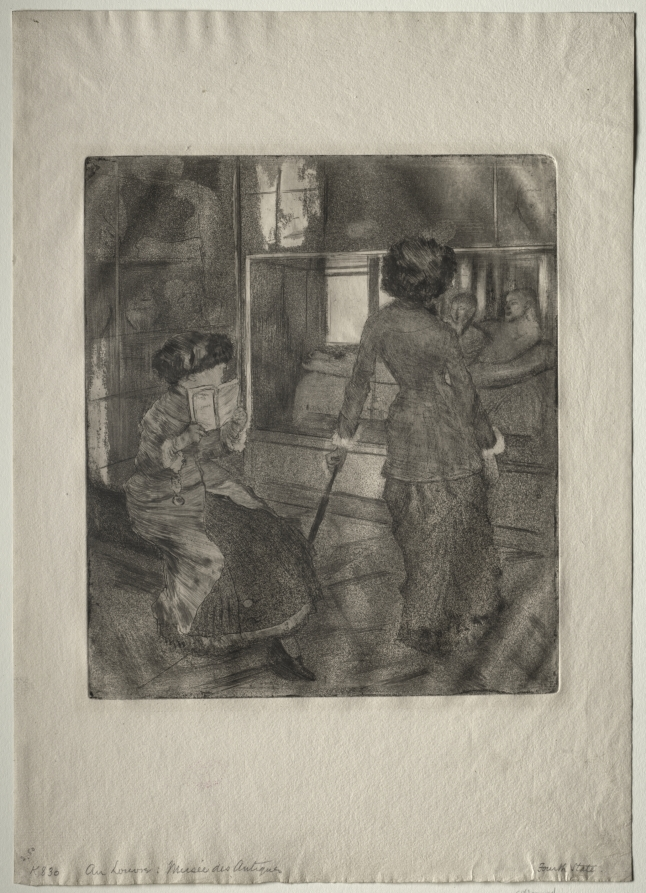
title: Mary Cassatt at the Louvre: The Etruscan Gallery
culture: France, 19th century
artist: Edgar Degas (French, 1834–1917)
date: 1879–80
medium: softground etching, drypoint, aquatint, and etching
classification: Print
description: This print is one of two in which Edgar Degas depicted Mary Cassatt and her sister Lydia at the Musée du Louvre. In this iteration of the subject, Casatt gazes intently at an Etruscan tomb, about 500 BC, excavated at Cerveteri, the largest ancient necropolis in the Mediterranean. Cassatt is viewed from behind while the enigmatically smiling couple, lying on top of a sarcophagus and enclosed in a glass case, face the viewer. Cassatt confronts the sculpture directly while Lydia reads about it in a guidebook.